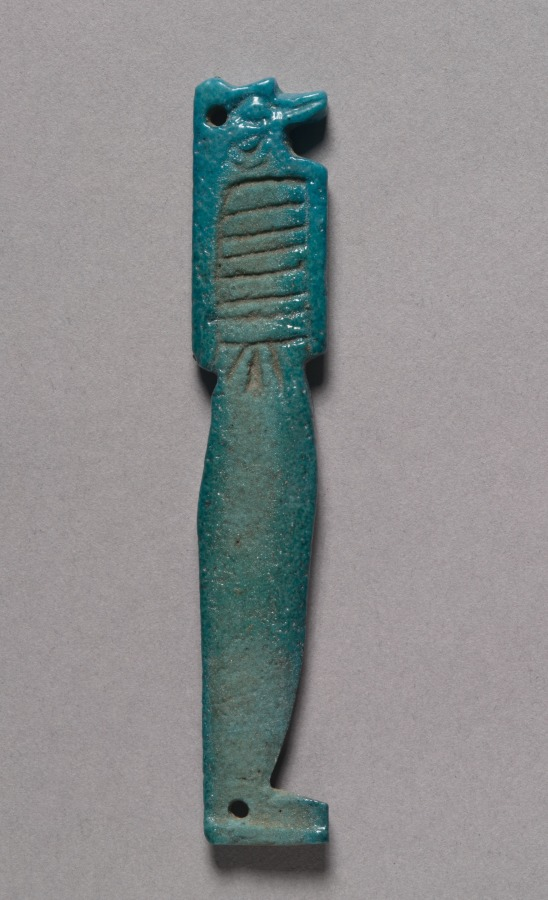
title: Son of Horus Amulets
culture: Egypt, Late period (715–332 BCE), Dynasty 26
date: 664–525 BCE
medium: bright turquoise faience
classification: Amulets